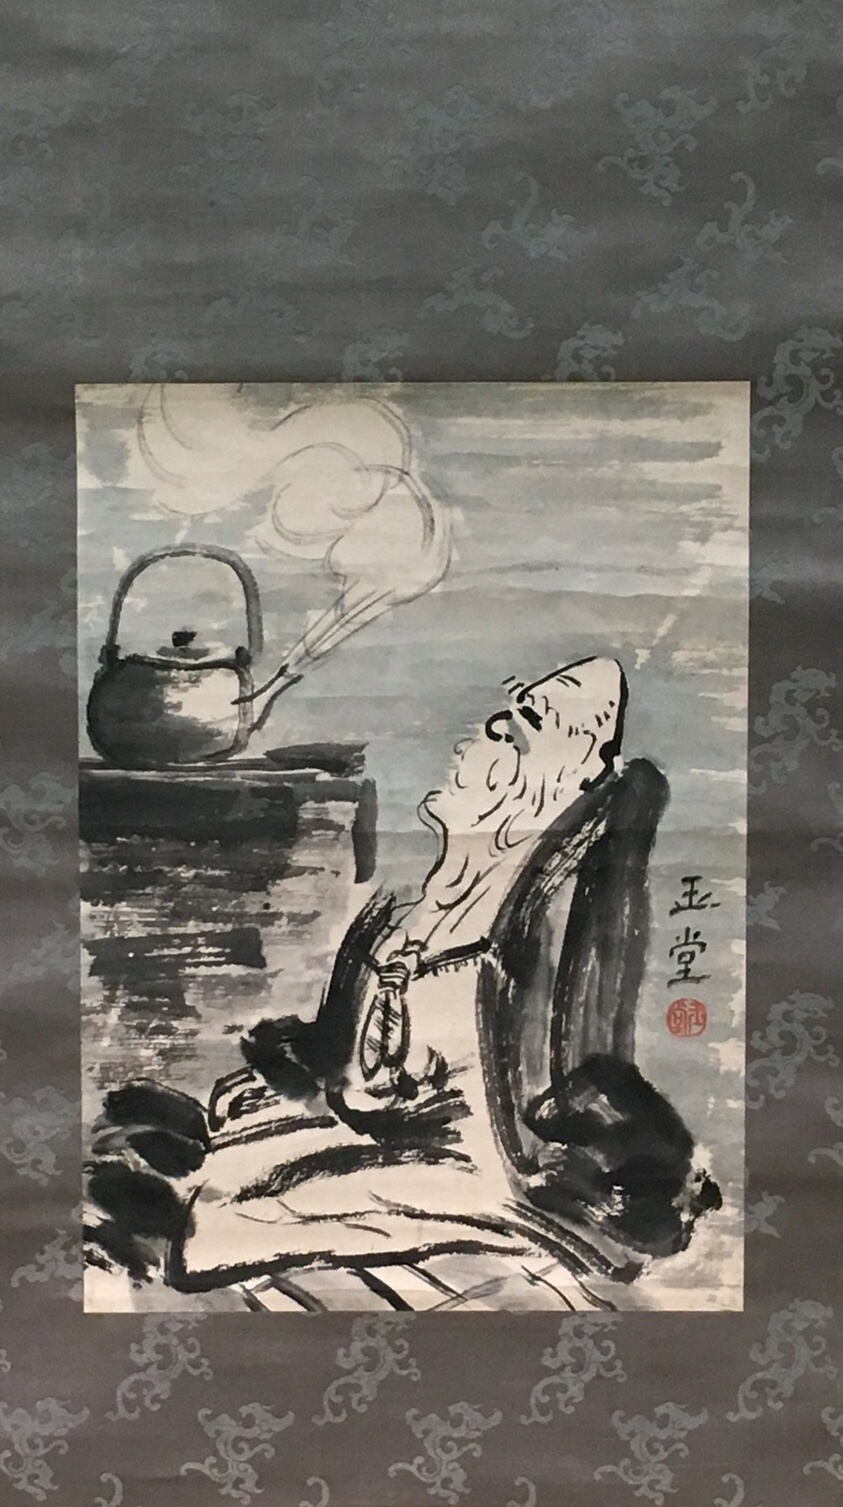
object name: Painting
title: Old priest and tea kettle.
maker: Urakami (Uragami) Gyokudo; Japanese, 1745–1820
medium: Hanging scroll; ink and light color on paper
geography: Japan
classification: hanging scroll; painting; asian art